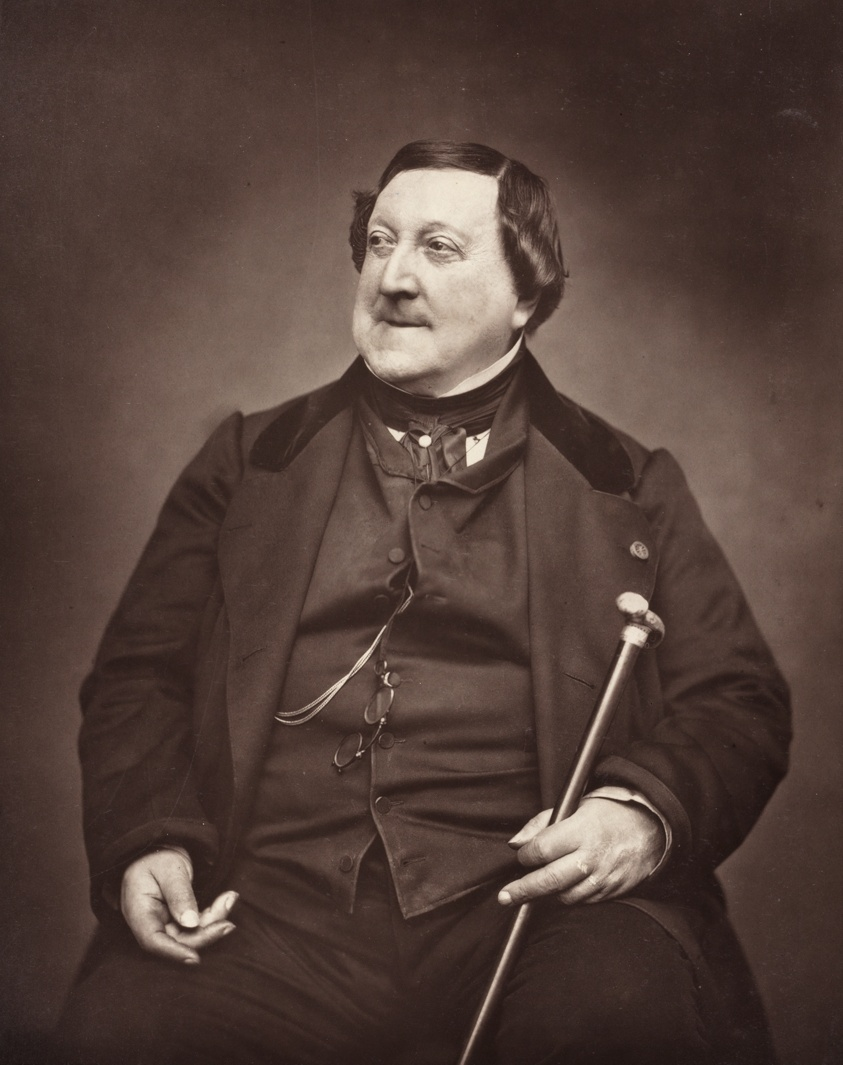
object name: Photograph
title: Gioachino Antonio Rossini (Italian composer, 1792-1868)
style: 19th century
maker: Étienne Carjat; French, 1828–1906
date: 1862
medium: Woodburytype, from the periodical “Galerie Contemporaine Littéraire, Artistique” (1876), volume 3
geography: France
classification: woodburytype; photomechanical process; photography; photograph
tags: Collected by Hugh Edwards, Paris, Contemporaine Littéraire